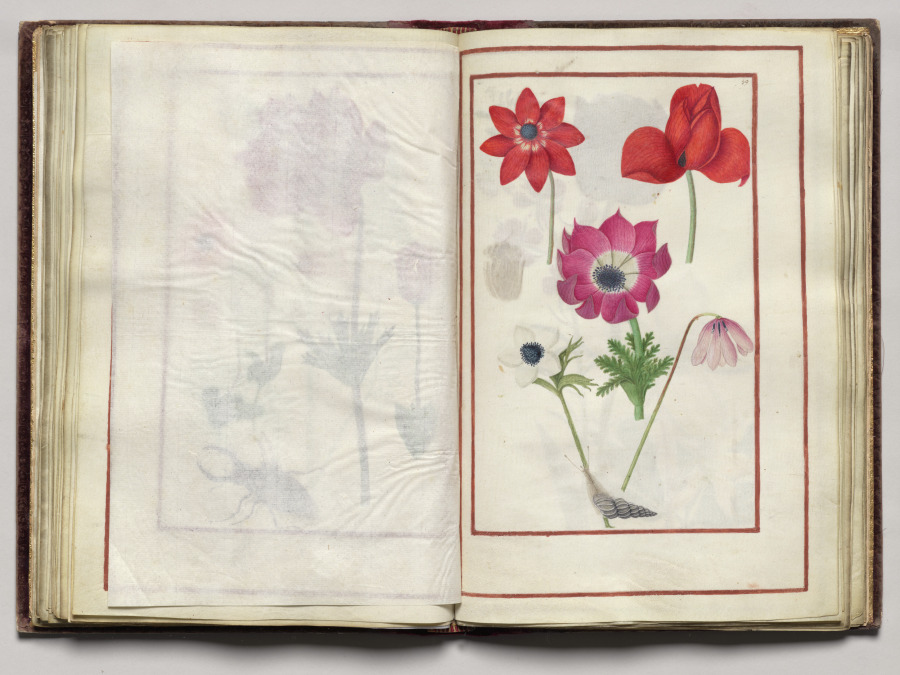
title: Anemones with a Snail, folio 30 (recto), from Florilegium (A Book of Flower Studies)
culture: France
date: 1608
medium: watercolor, ink, silver, and gold over occasional traces of pencil, on vellum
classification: Bound Volume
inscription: Dated: Poitiers 1608 (on frontispiece) Signed: On frontispiece in black ink, lower right: Van Kuyk Notation on drawing: Frontispiece: in pencil, lower margin: * élève de Van Kessel, peintre flammand (* in pencil also appears in front of Van Kuyk's name).